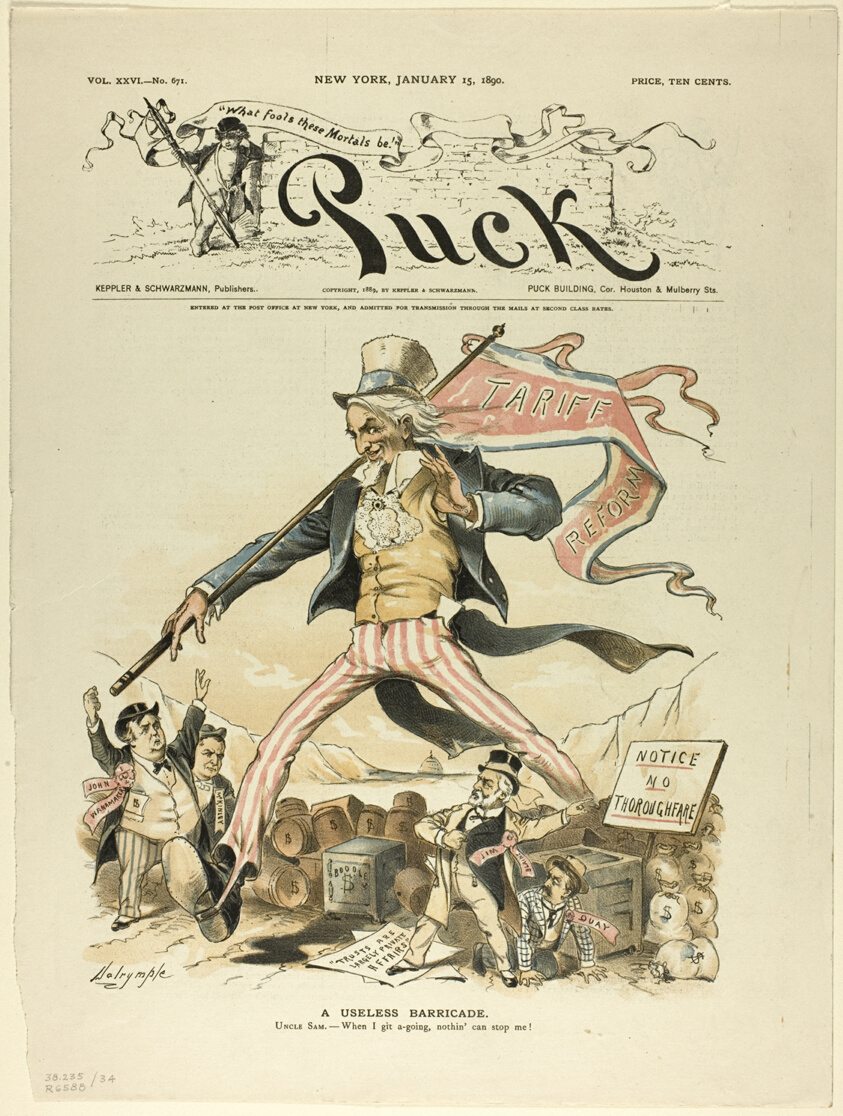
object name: Print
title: A Useless Barricade, from Puck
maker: Louis Dalrymple (American, 1865-1905)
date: published January, 15 1890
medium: Color lithograph on newsprint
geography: United States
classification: lithograph; print; prints and drawing